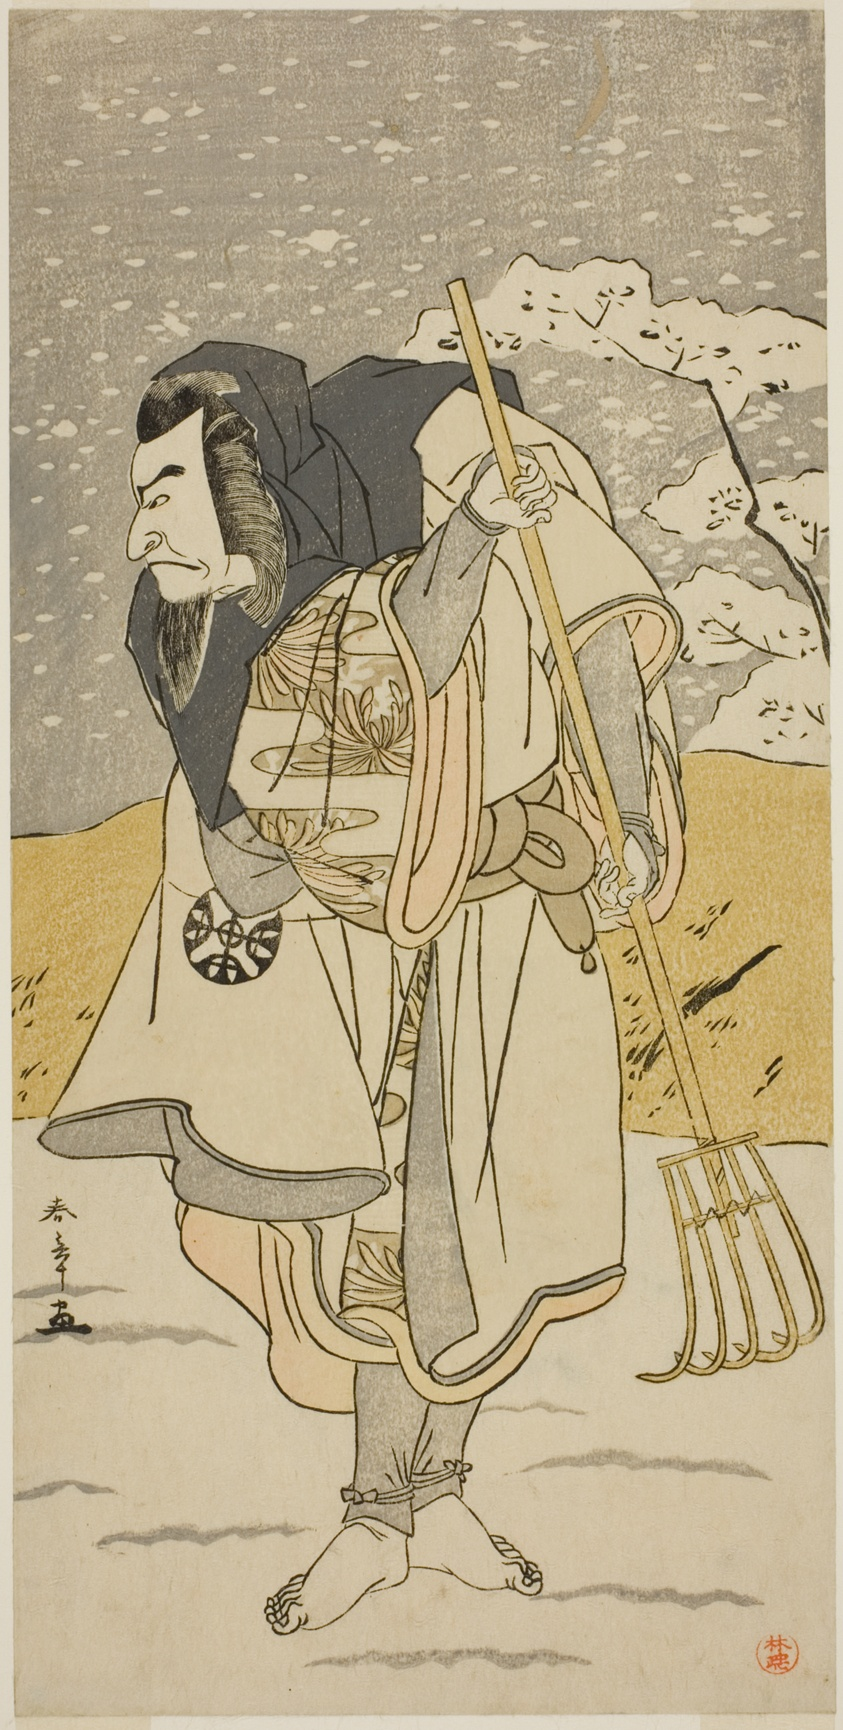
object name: Print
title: The Actor Nakamura Nakazo I as Akugenda Yoshira Disguised as a Pilgrim, in the Play Chigo Torii Tobiiri Kitsune, Performed at the Ichimura Theater in the Eleventh Month, 1777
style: Japanese (culture or style)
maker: Katsukawa Shunsho 勝川 春章; Japanese, 1726-1792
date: c. 1777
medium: Color woodblock print; hosoban; from a multisheet composition (?)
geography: Japan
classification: woodblock print; print; asian art